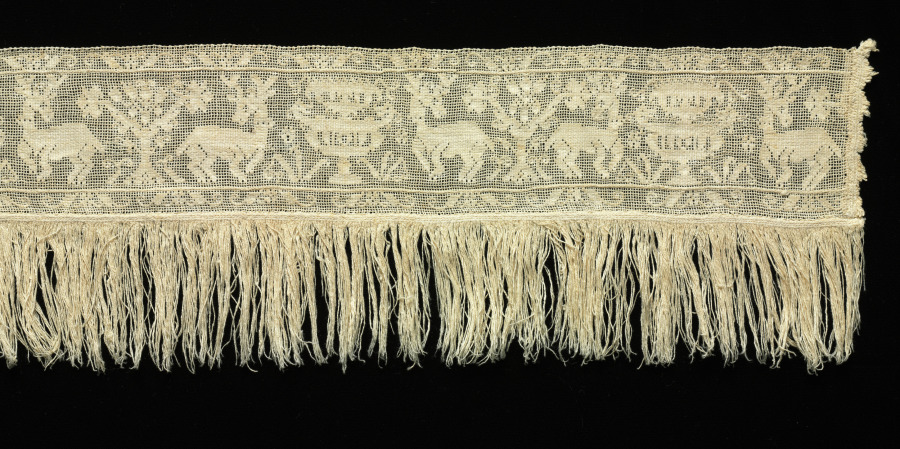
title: Border with Stags, Fountains, and Trees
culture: Italy, Sicily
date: 1500s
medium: Bleached linen (est.): needle lace, burato (twined ground and darned in one direction) and applied fringe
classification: Lace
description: Prancing stags, represented with their heads turned backward, flank an ornate fountain. The fountain motif could allude to rejuvenation and immortality.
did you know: Plant motifs, such as the blooming bushes found here, flanked by birds, were popular for their associations with well-being or blessing.